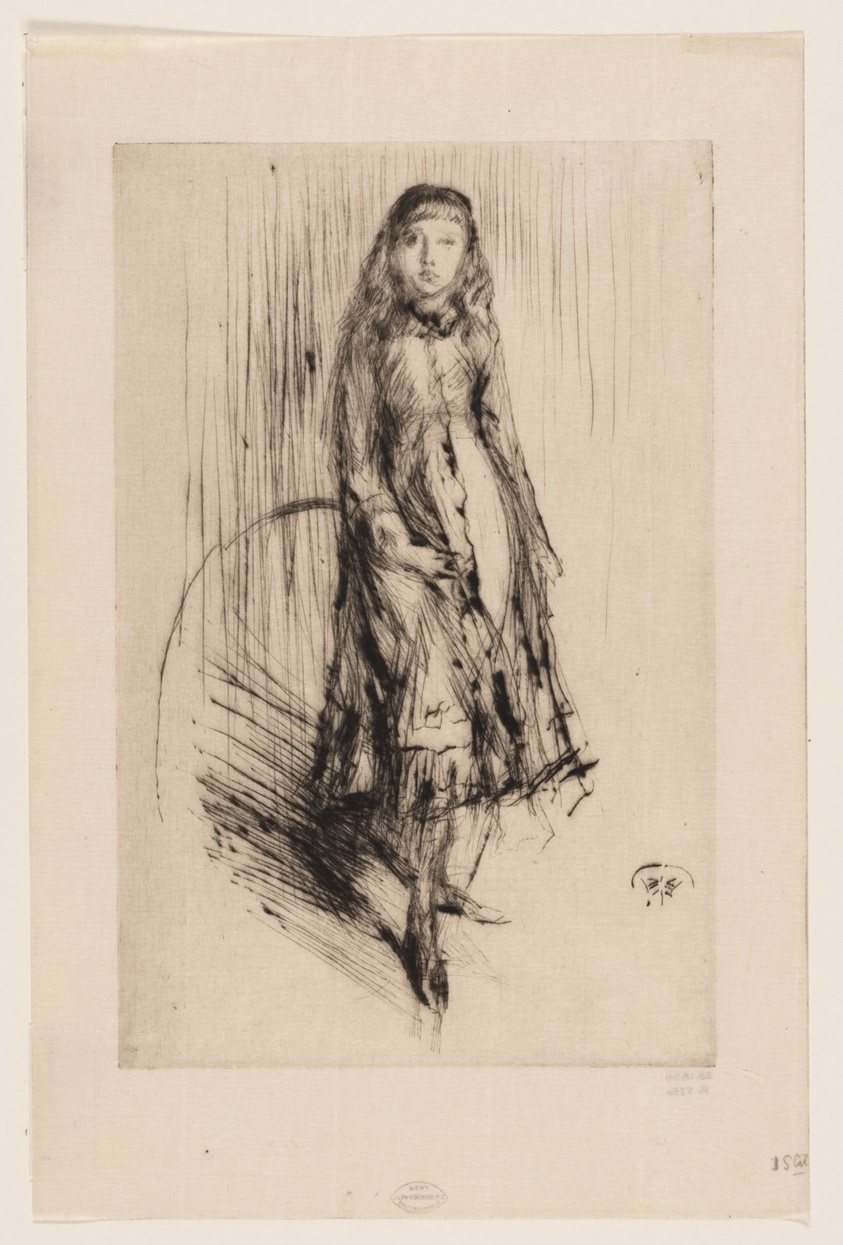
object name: Print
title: Florence Leyland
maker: James McNeill Whistler (American, 1834-1903)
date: 1874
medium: Drypoint in black ink on cream Japanese paper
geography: United States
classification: drypoint; print; prints and drawing; paper